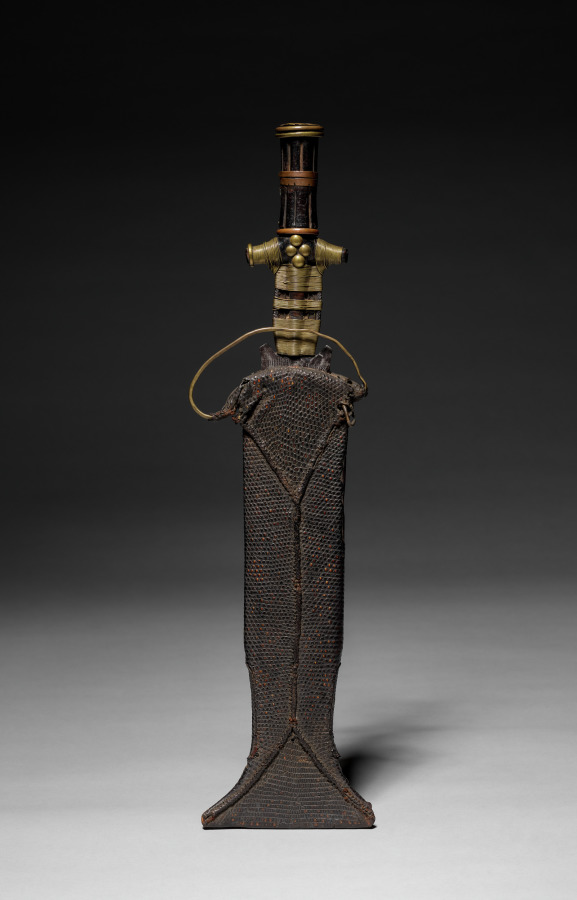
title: Knife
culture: Africa, Central Africa, Democratic Republic of Congo, unknown maker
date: 1800s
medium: Iron, wood, copper alloy, reptile skin, leather or rawhide, and upholstery studs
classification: Arms and Armor